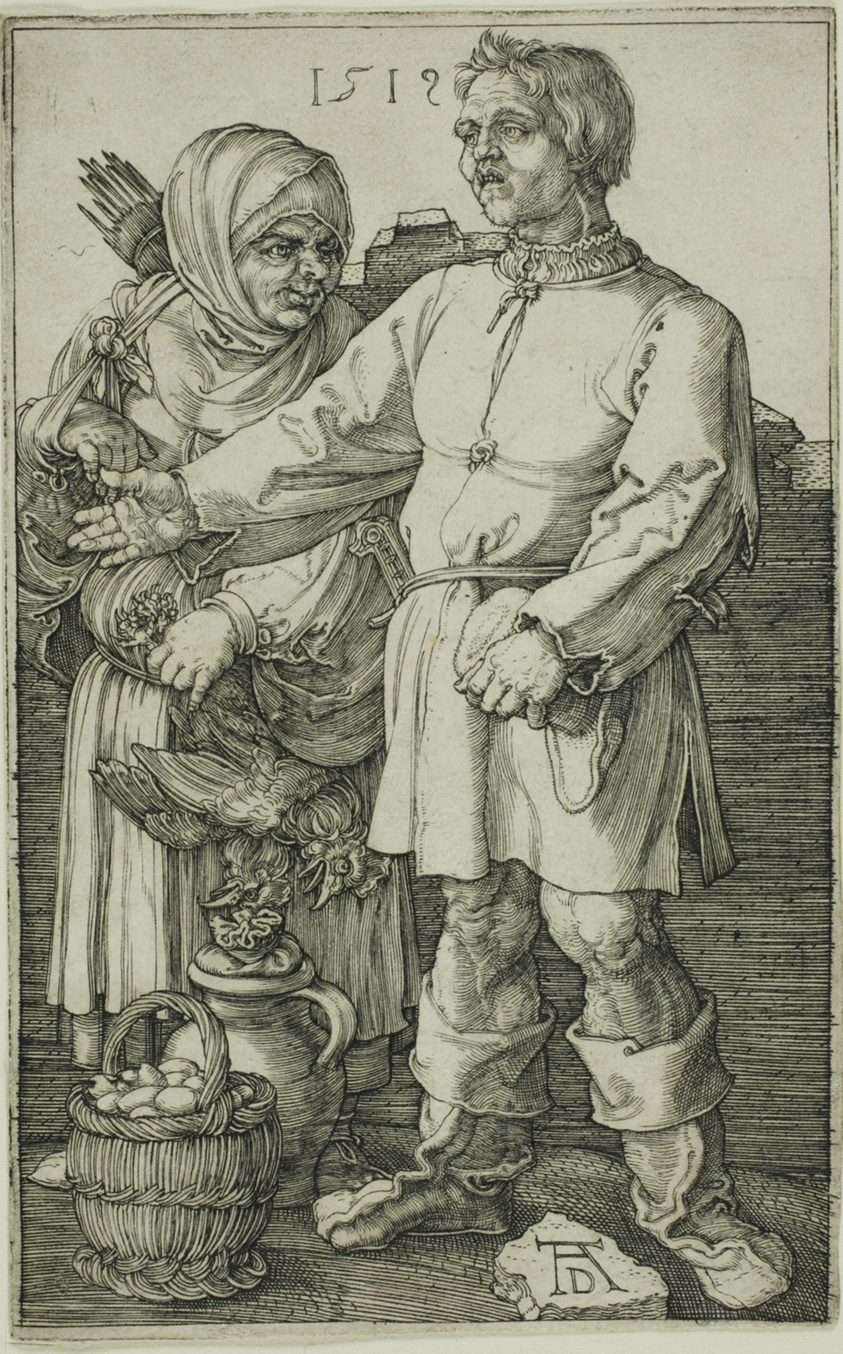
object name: Print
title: The Peasant and His Wife at Market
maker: Albrecht Dürer (German, 1471-1528)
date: 1519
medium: Engraving in black on ivory laid paper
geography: Germany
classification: engraving; print; prints and drawing; paper